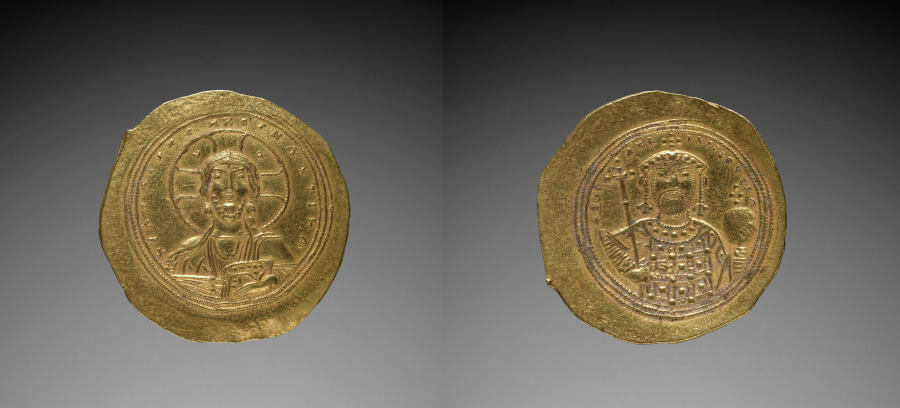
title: Nomisma with Constantine IX Monomachus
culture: Byzantium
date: 1042–1055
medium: gold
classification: Coins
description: Byzantine Gold Coins The vast number of surviving Byzantine coins attests to the level of trade across the empire. Controlled and supervised by the emperor, the producers of coins took care to represent his authority and reflect his stature. Talented artists were recruited to engrave the dies (molds) used for the striking of coins. Emperors increasingly came to include their heirs and co-emperors on their coinage, as well as other family members or even earlier rulers. Coins were recognized, then as now, as small, portable works of art. With their inscriptions and images, Byzantine coins provide valuable documentation of historical events and a record of the physical appearance of the emperors. The coins shown here include the solidus, the basic gold coin of 24 karats; the tremissis, a gold coin of one-third the weight and value of the solidus; and the nomisma, which in the 10th century replaced the solidus as the standard gold coin.